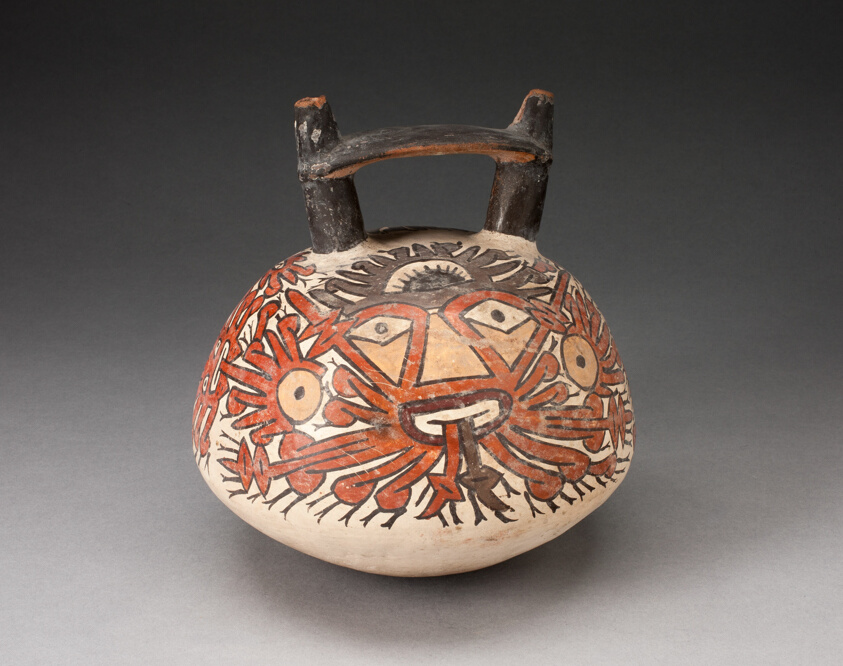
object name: Vessel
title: Doubnle Spout Vessel Depicing Ornametal Faces with Numerous Emanations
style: nazca, early intermediate period, Pre-Columbian, americas, Arts of the Americas, andean, andes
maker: Nazca; South coast, Peru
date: 180 BCE–500 CE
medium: Ceramic and pigment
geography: Peru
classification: earthenware; art of the americas; ceramics; vessel